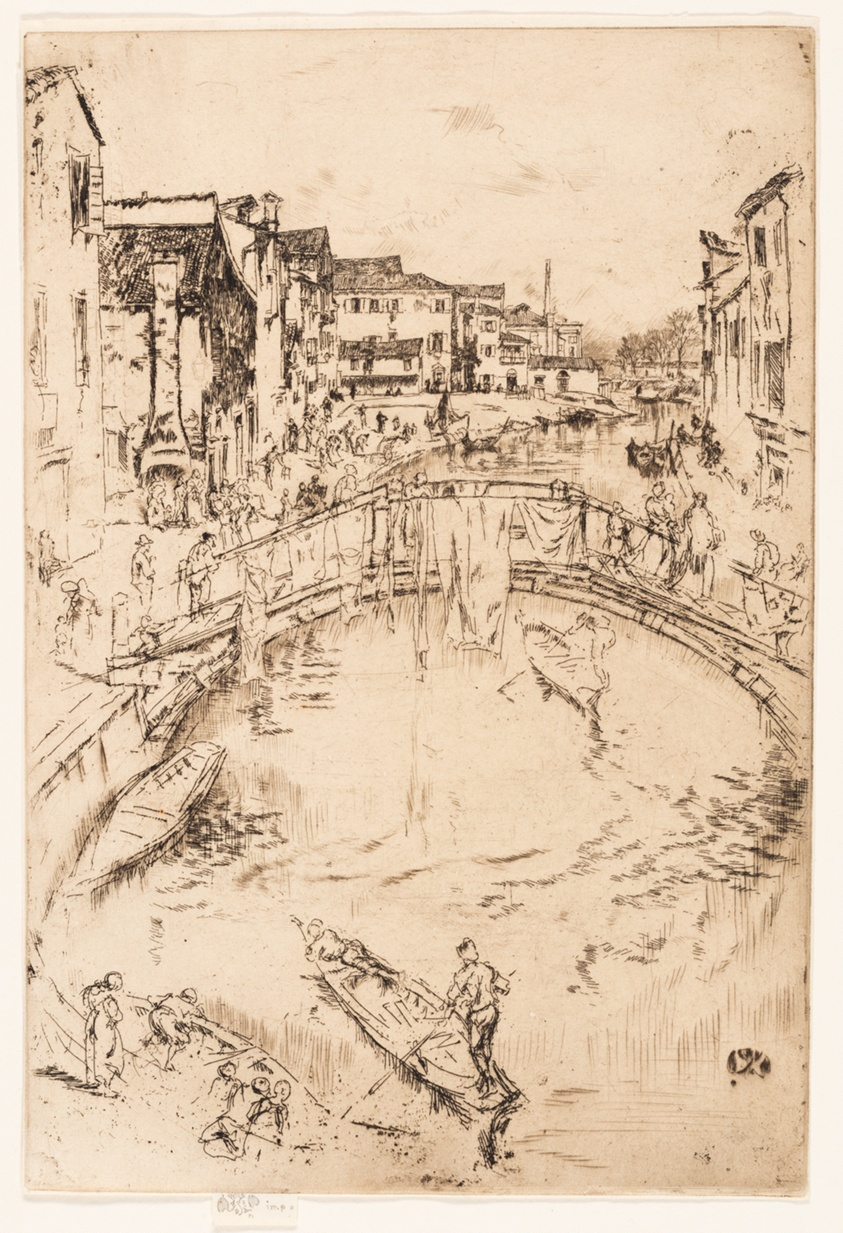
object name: Print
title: The Bridge, Santa Marta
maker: James McNeill Whistler (American, 1834-1903)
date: 1879/80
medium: Etching and drypoint with foul biting in black ink on cream laid paper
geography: United States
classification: etching; foul biting; drypoint; print; prints and drawing; paper